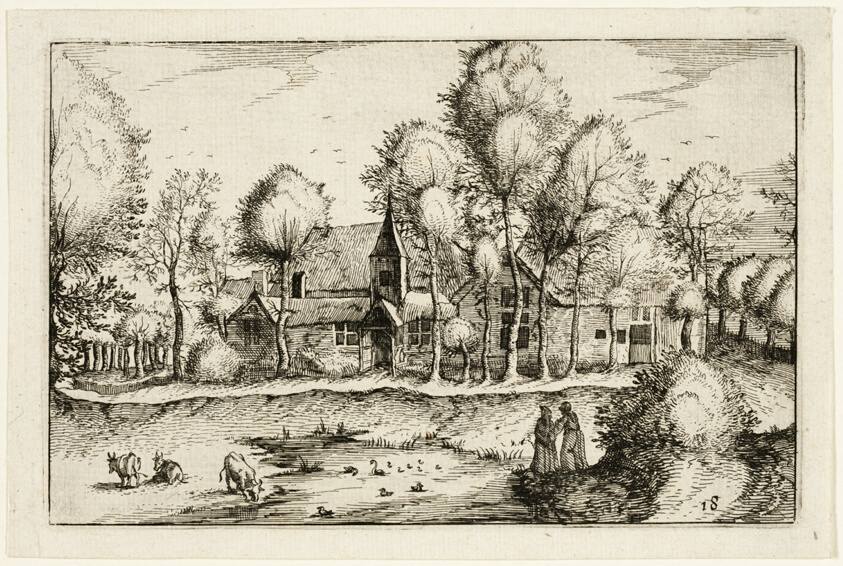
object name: Print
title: A Pond, plate eighteen after Pictures of Farms, Country Houses and Rustic Villages (Praediorum villarum et rusticarum casularum icones)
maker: Claes Jansz. Visscher (Dutch, 1587-1652); after Unknown Flemish Artist, misidentified as Pieter Bruegel, the elder (Flemish, 1525/30-1569)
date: 1612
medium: Etching in black on ivory laid paper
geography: Netherlands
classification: etching; print; prints and drawing